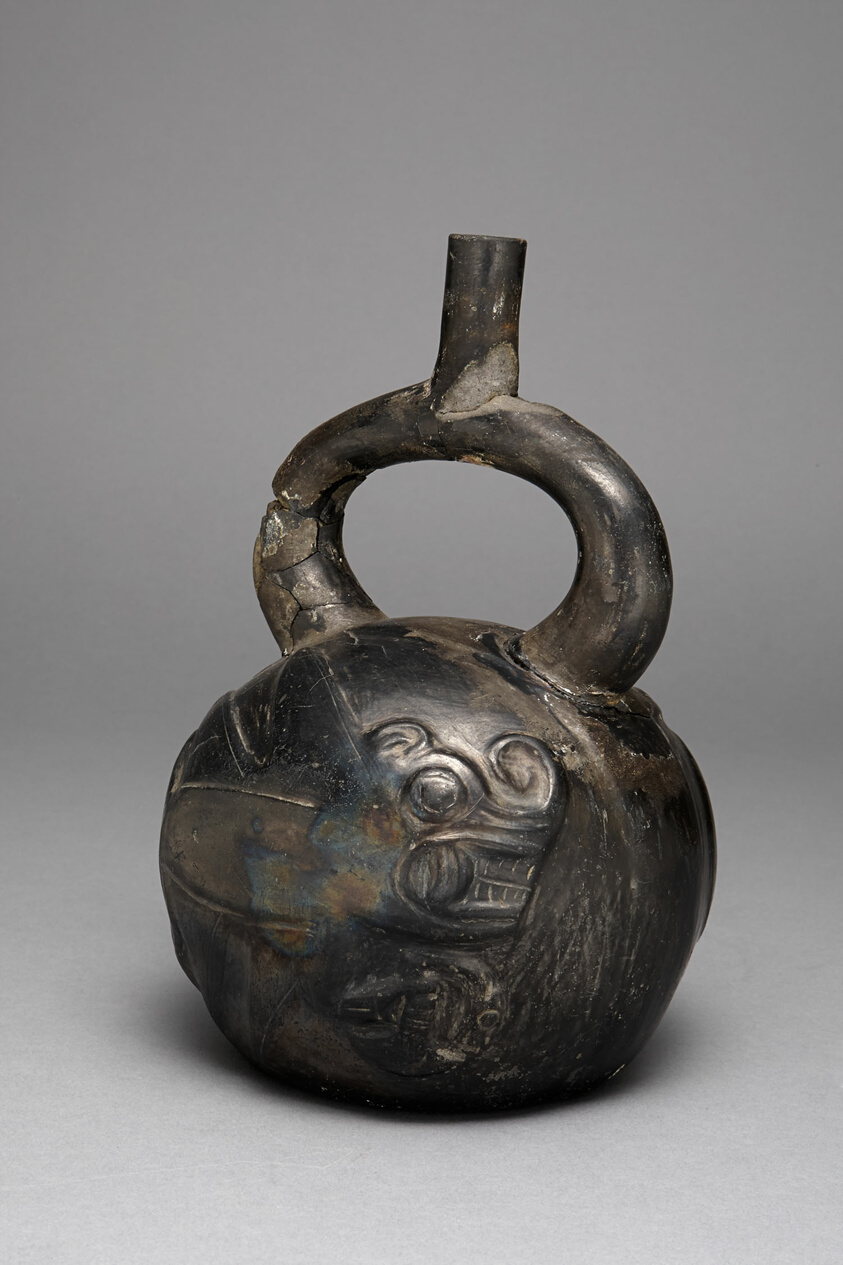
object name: Vessel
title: Stirrup Spout Vessel with Composite Feline Fish Relief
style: moche, andes, Arts of the Americas, south american, andean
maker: Moche (Chimbote, Santa Valley, north coast, Peru)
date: 100 BCE–500 CE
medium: Ceramic and pigment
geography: Santa Valley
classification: blackware (black basaltes); earthenware; ceramics; vessel; art of the americas